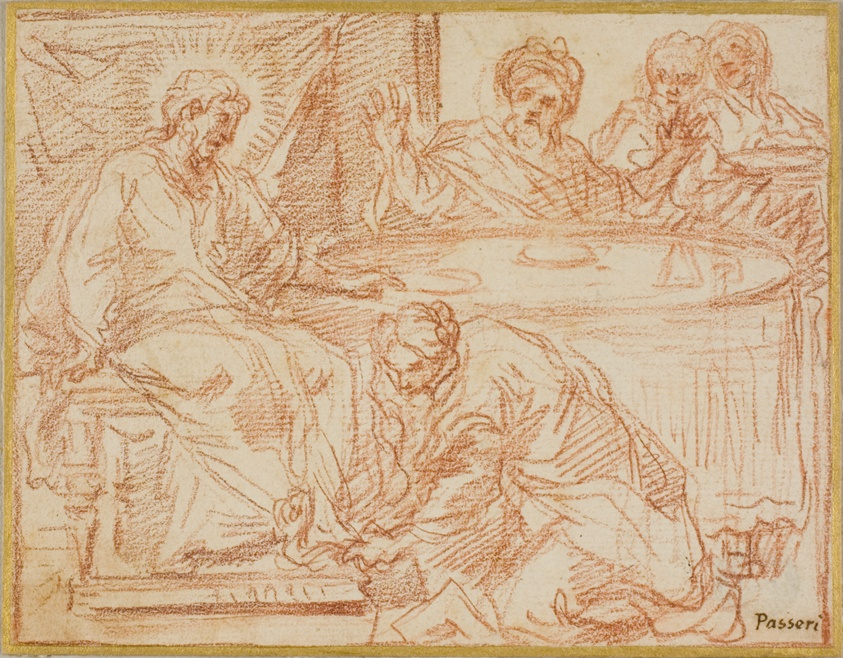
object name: Drawing and Watercolor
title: Magdalene Washing Christ's Feet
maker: Attributed to Giuseppe Passeri (Italian, 1654-1714); or Giuseppe Bartolomeo Chiari (Italian, 1654-1727)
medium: Red chalk on cream laid paper, laid down on cream wove card, tipped onto gray wove paper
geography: Italy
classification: chalk; drawings (visual works); prints and drawing